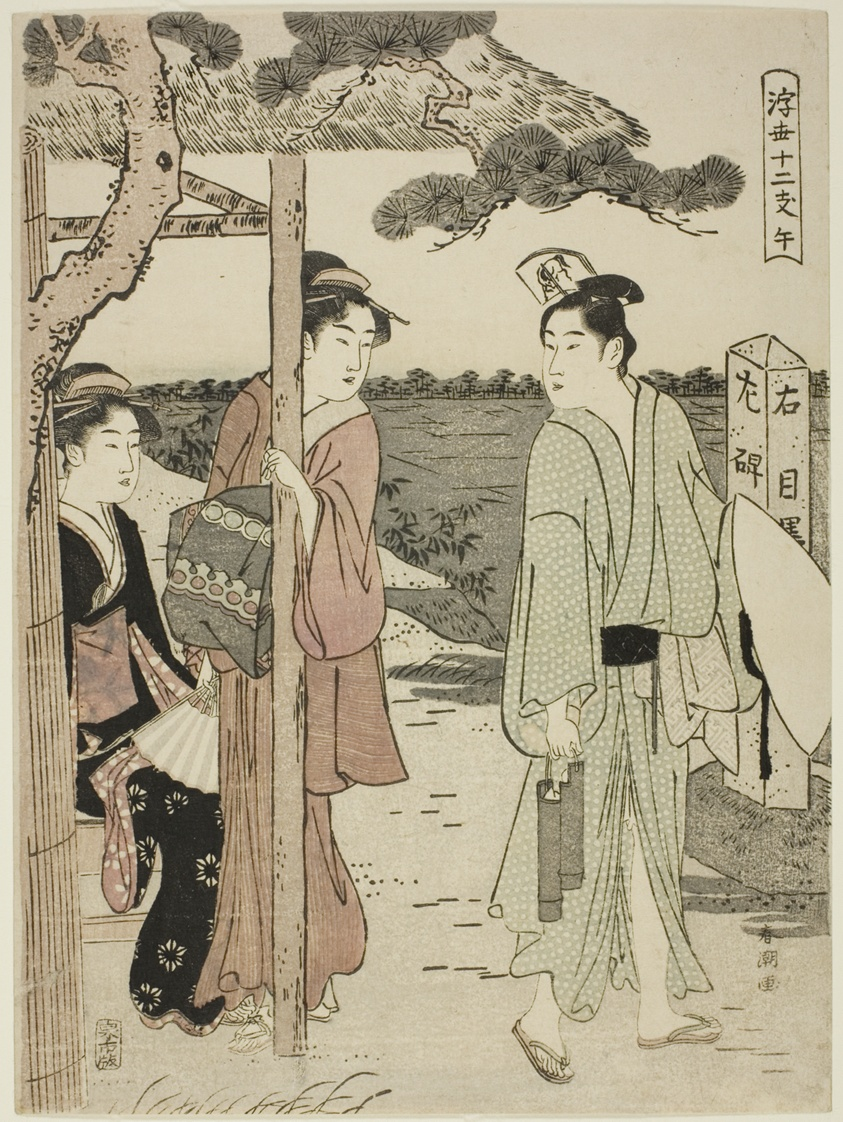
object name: Print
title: Horse, from the series "Twelve Hours of the Floating World (Ukiyo juni shi)"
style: Japanese (culture or style)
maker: Katsukawa Shuncho; Japanese, active c. 1780-1801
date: c. 1780/1801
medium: Color woodblock print; oban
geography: Japan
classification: woodblock print; print; asian art